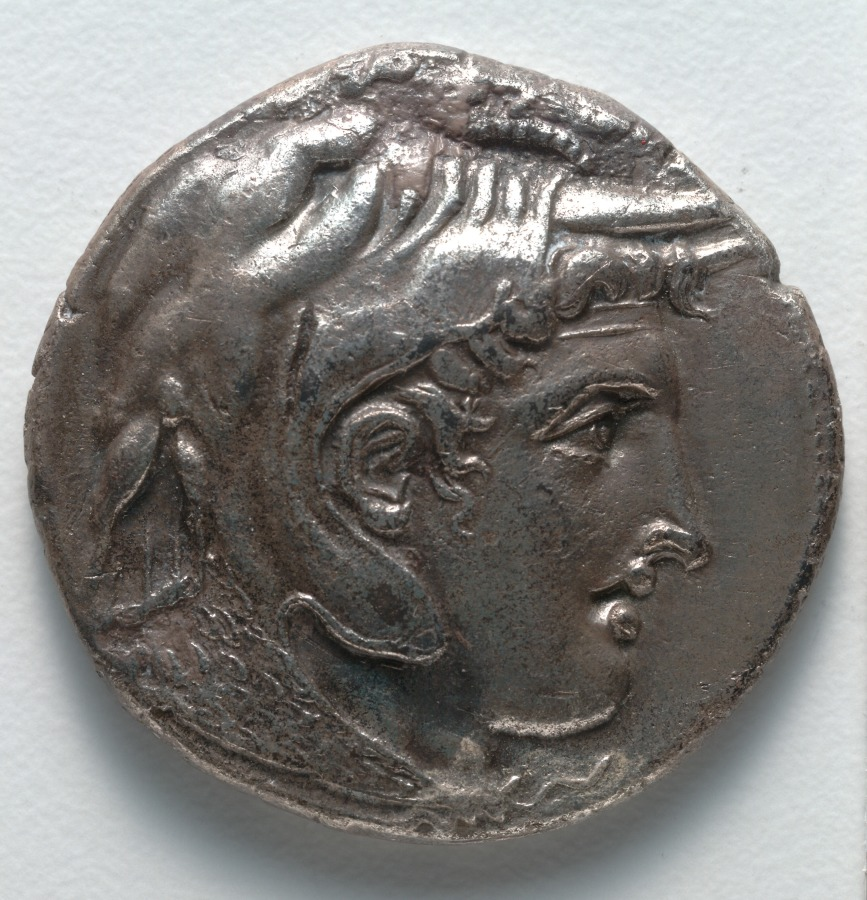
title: Tetradrachm: Head of Alexander III [The Great] (obverse); Athena (reverse)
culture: Egypt, Greco-Roman period (332 BCE–395 CE), reign of Ptolemy I (303–282 BCE), minted at Alexandria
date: 306 BCE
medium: silver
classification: Coins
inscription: ΑΛΕΞΑΝΔΡΟΥ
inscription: HP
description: Much like his former commander Alexander III (the Great) showed connections to Herakles and Zeus, Ptolemy I Soter (the Savior) used coins to validate his succession to power. Thus, in place of Herakles with lion-skin, this coin shows Alexander in an elephant headdress, referring to their shared Eastern triumphs. On the reverse is Athena Promachos, striding forward with shield and spear. Before her are a helmet and an eagle, and behind her the inscription ΑΛΕΞΑΝΔΡΟΥ, “of Alexander.”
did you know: The image of Alexander the Great in an elephant headdress references his Eastern conquests.